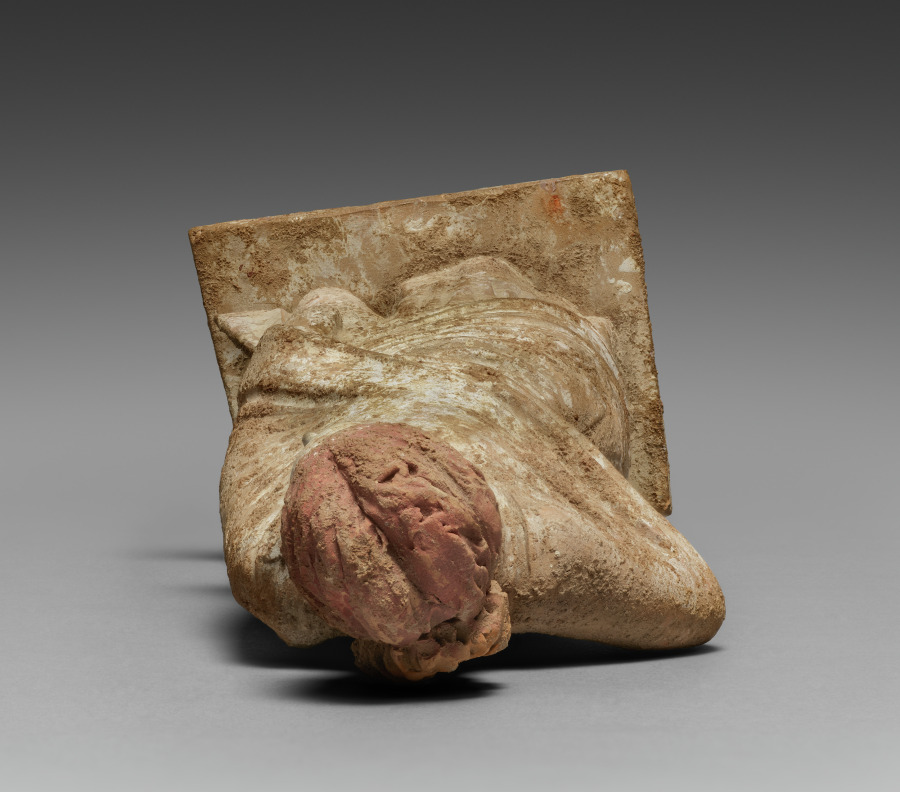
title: Female Figurine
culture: Greece, Tanagra (Boeotia)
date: 330–200 BCE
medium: molded terracotta, painted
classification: Sculpture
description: This figurine depicts an elegantly draped young woman wearing a cloak or himation over a dress called a chiton. The contrast between her sharp elbow and flowing skirts illustrates an interest in the stretch and fold of different fabrics. Originally brilliantly painted, this figurine still has traces of color such as the red hair and the white on her face. The site of Tanagra in central Greece is known for its abundance of terracotta figurines like this one made by mixing and matching different molds.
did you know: This woman’s rolled hairstyle is now called a “melon coiffure.”